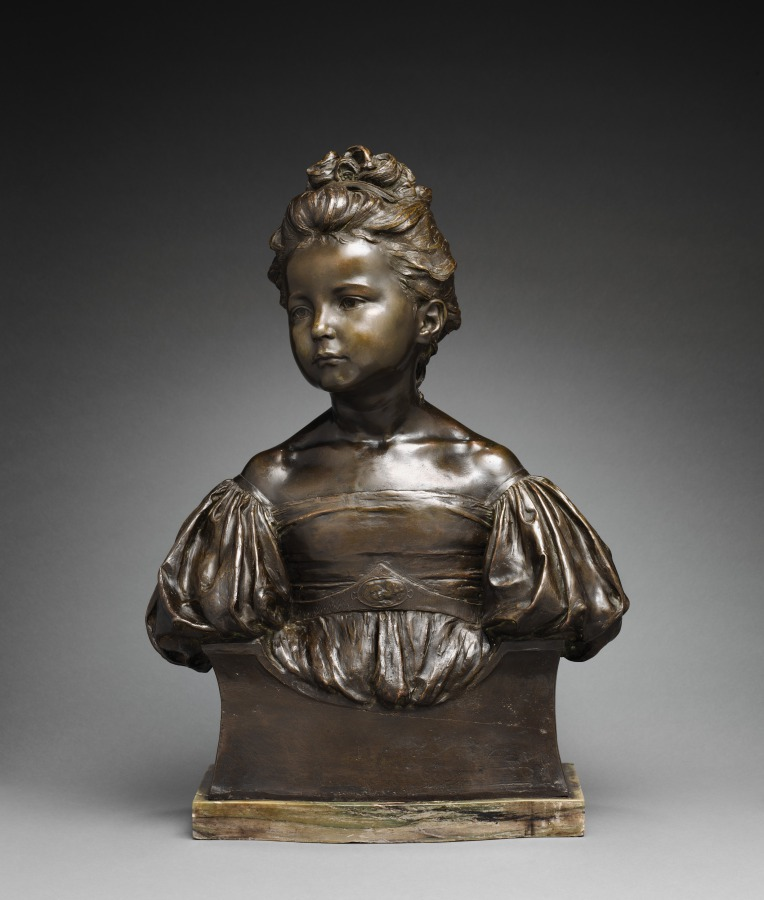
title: The Age of Innocence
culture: England, 19th century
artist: Alfred Drury (British, 1856–1944)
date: 1897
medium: bronze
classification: Sculpture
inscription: signed and dated: A. DRURY 97.